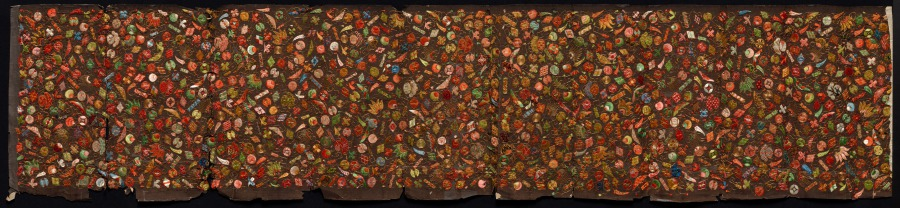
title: Embroidered Strip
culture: Japan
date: late 1800s-early 1900s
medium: embroidery; silk and gold thread on silk ground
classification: Embroidery